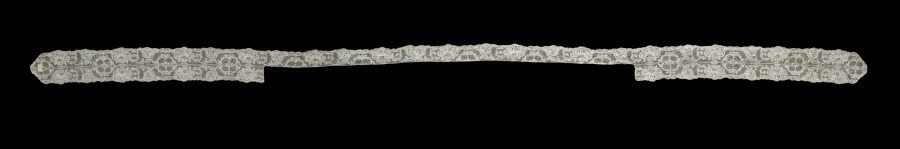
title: Lace Lappets and Edging for Cap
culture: Belgium, Mechelen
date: 1700s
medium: Linen: bobbin lace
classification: Lace